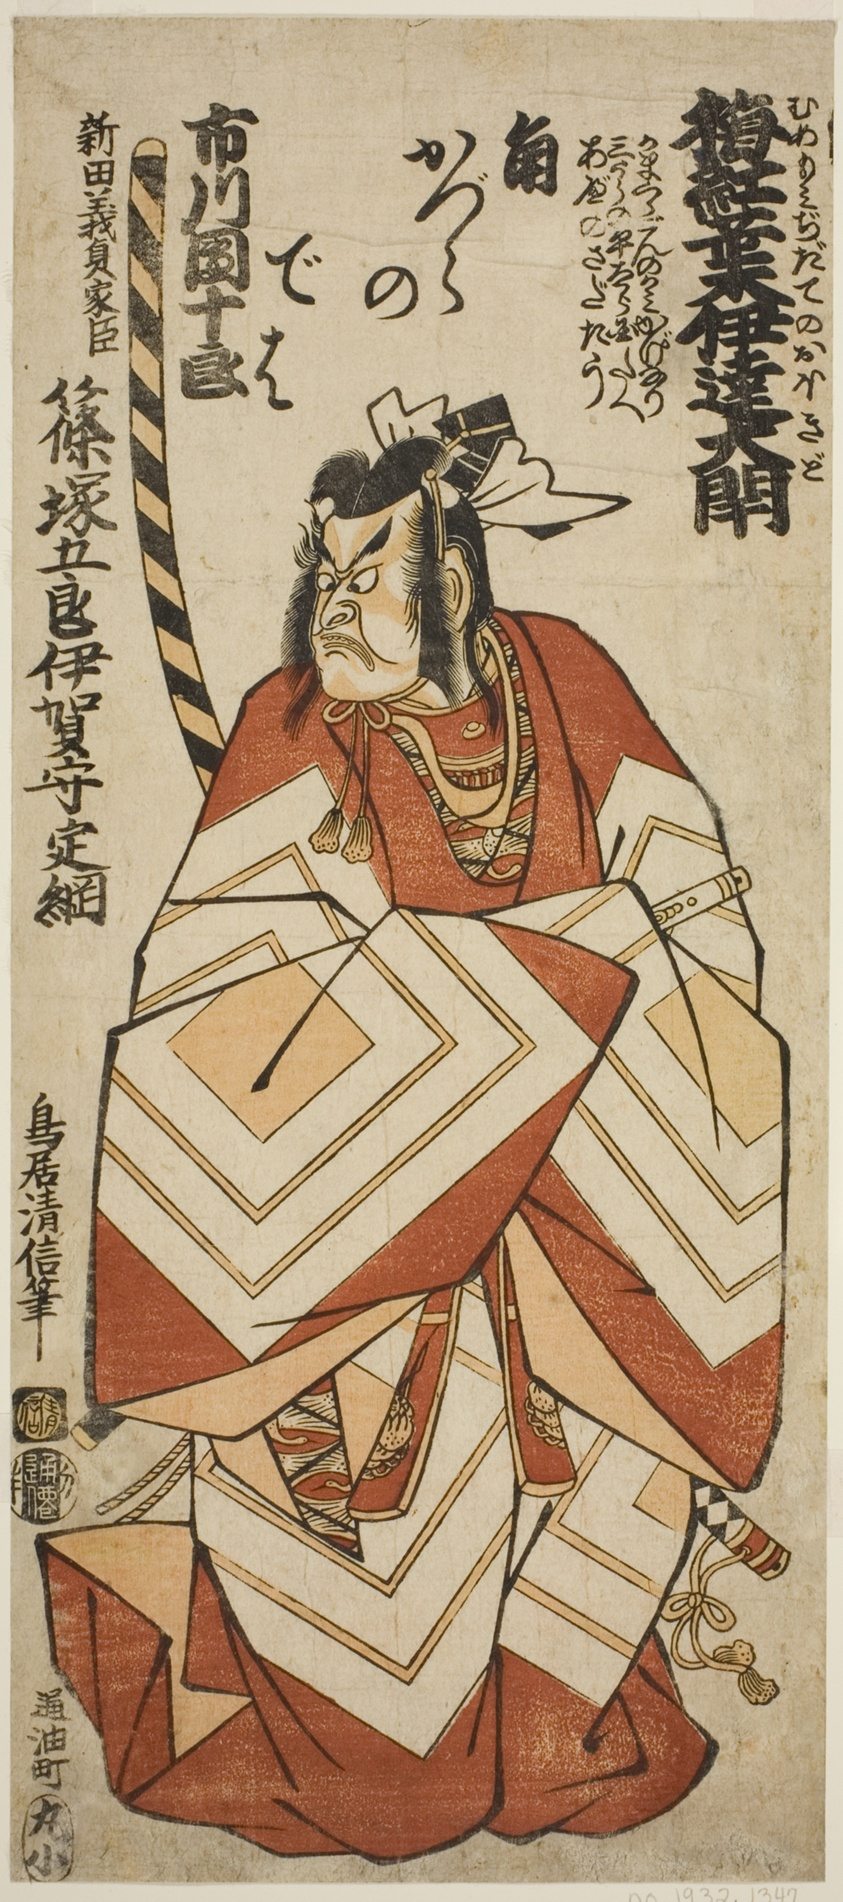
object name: Print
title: The actor Ichikawa Danjuro IV as Shinozuka Goro Sadatsuna in the play "Ume Momiji Date no Okido," performed at the Ichimura Theater in the eleventh month, 1760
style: Japanese (culture or style)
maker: Torii Kiyonobu II (Japanese, active c. 1725-61)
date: 1760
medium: Color woodblock print; hosoban, benizuri-e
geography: Japan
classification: woodblock print; print; asian art